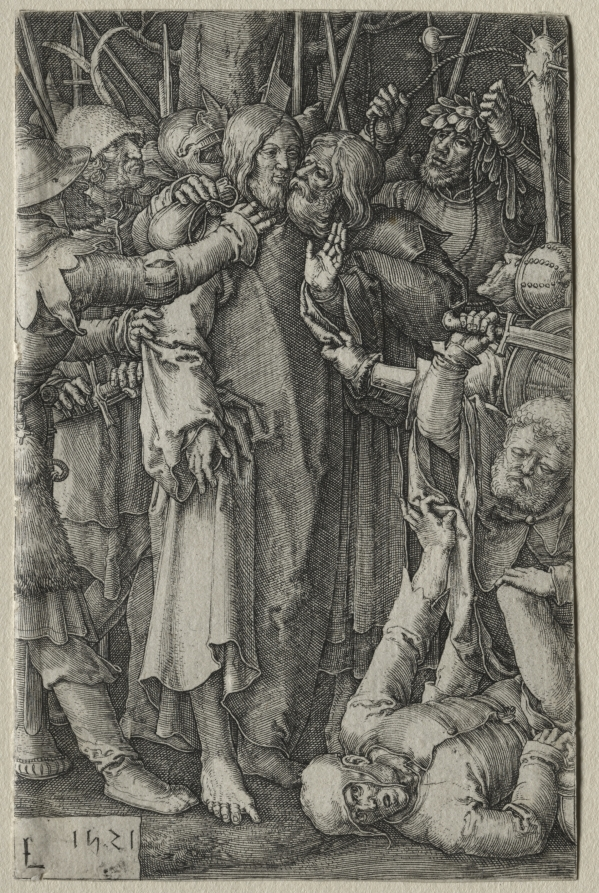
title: The Passion: The Capture of Jesus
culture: Netherlands, 16th century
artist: Lucas van Leyden (Netherlandish, 1494–about 1533)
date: 1521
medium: engraving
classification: Print